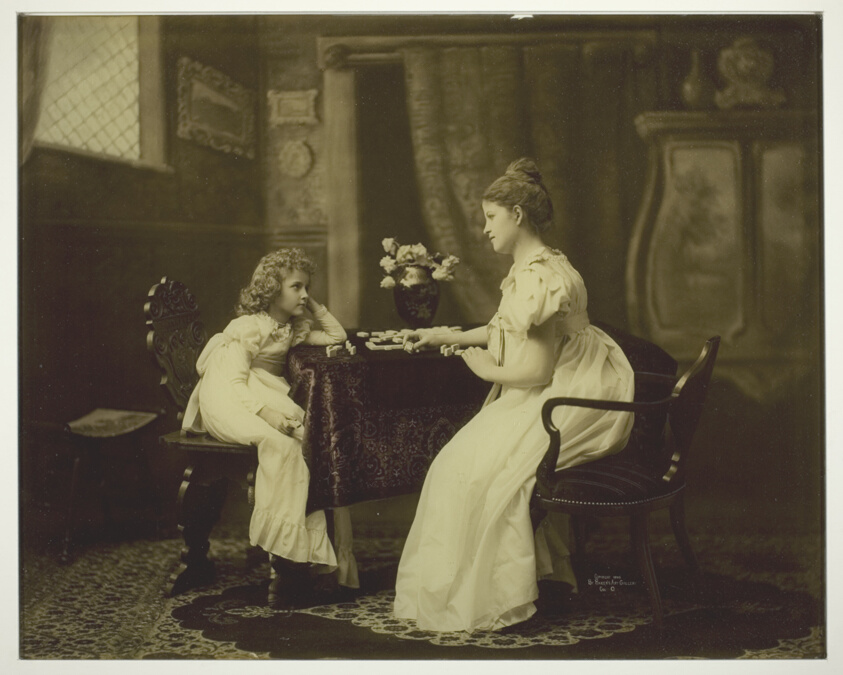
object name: Photograph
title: Woman and Child Playing Dominoes at Table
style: 19th century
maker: Artist unknown; American, late 19th century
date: c. 1898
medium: Albumen print affixed to glass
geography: United States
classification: albumen silver print; photographic process; photography; photograph